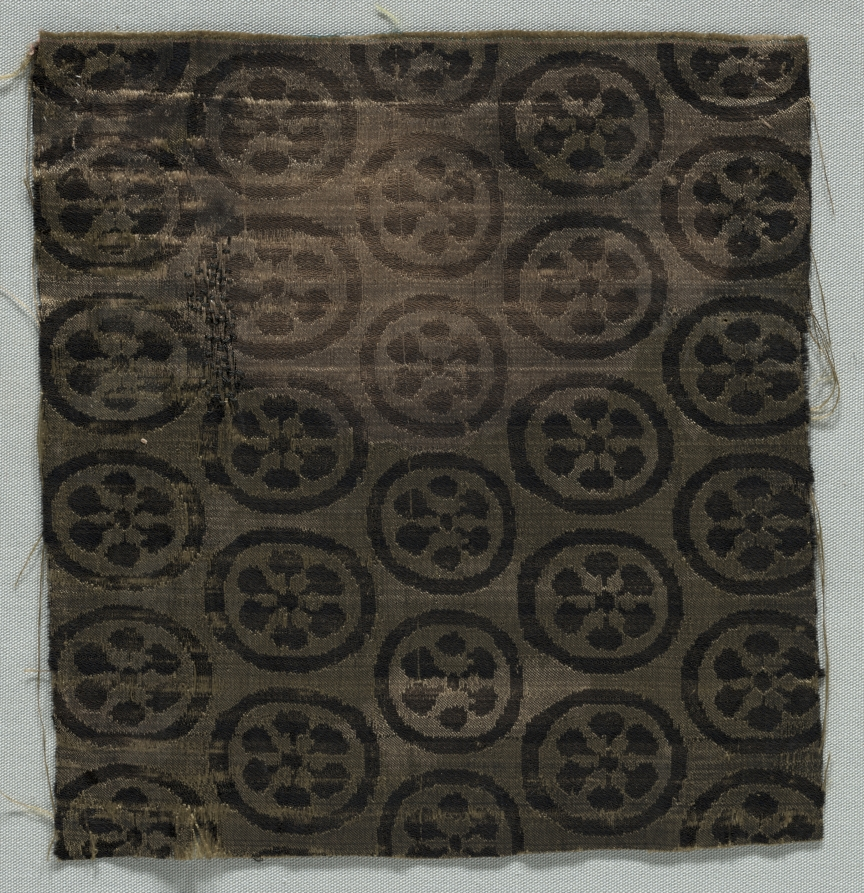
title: Silk Damask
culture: Italy, 15th century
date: 1400s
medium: damask, silk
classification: Textile